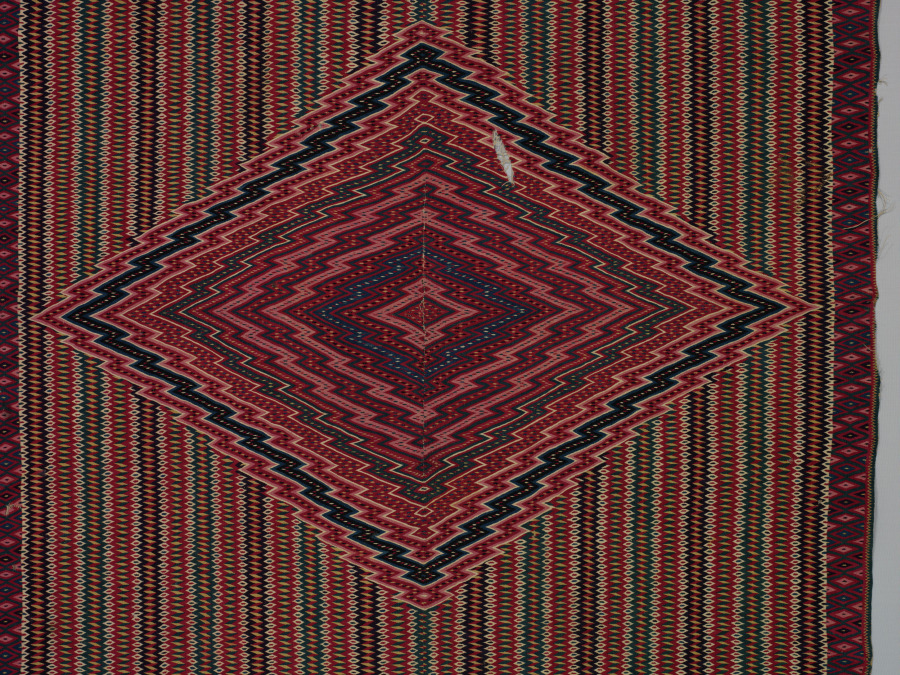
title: Saltillo Sarape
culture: Mexico, Coahuila state, Saltillo Region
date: c. 1820–50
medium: Wool, cotton; tapestry weave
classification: Textile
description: The sarape (wearing blanket) is a classic Mexican men’s garment that became a symbol of national identity and pride after Mexico achieved independence from Spain in 1821. Examples woven between about 1750 and 1875 in Saltillo, a town in northern Mexico, are the sarape’s most famous representatives, prized for their design, color, and technical refinement.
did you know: Saltillo sarapes (wearing blankets) are prized for their design, color, and technical refinement.